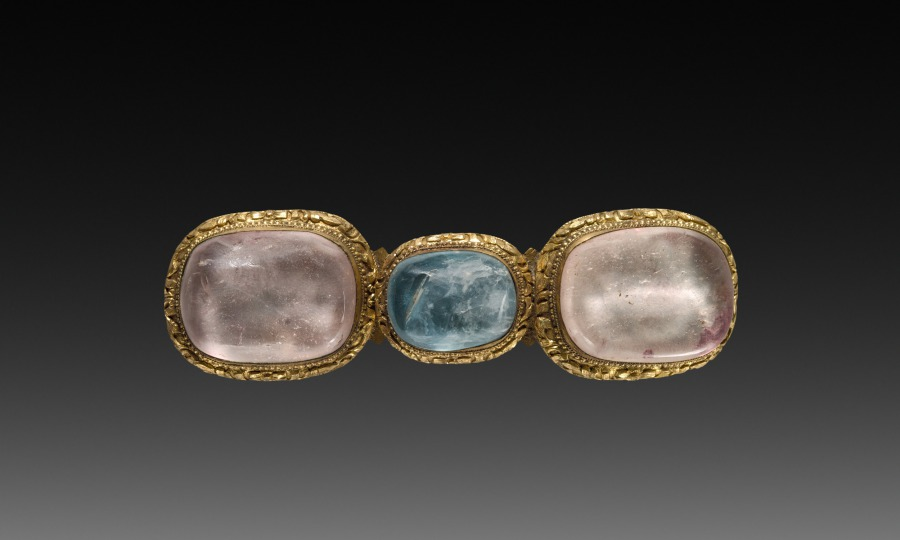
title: Buckle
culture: China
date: 1900s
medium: gilt brass, engraved and set with rose quartz and gray stone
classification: Jewelry